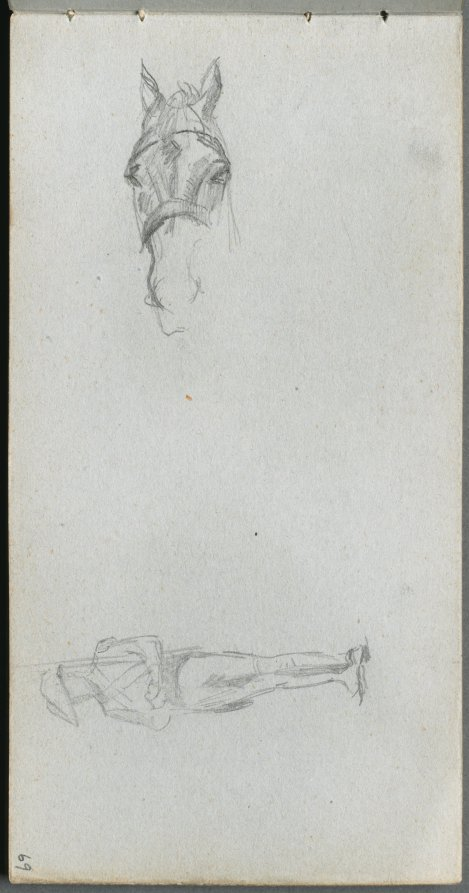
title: Sketchbook, page 69: Study of a Hand, a Horse, and a Figure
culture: France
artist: Ernest Meissonier (French, 1815–1891)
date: c. 1860s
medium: graphite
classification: Bound Volume